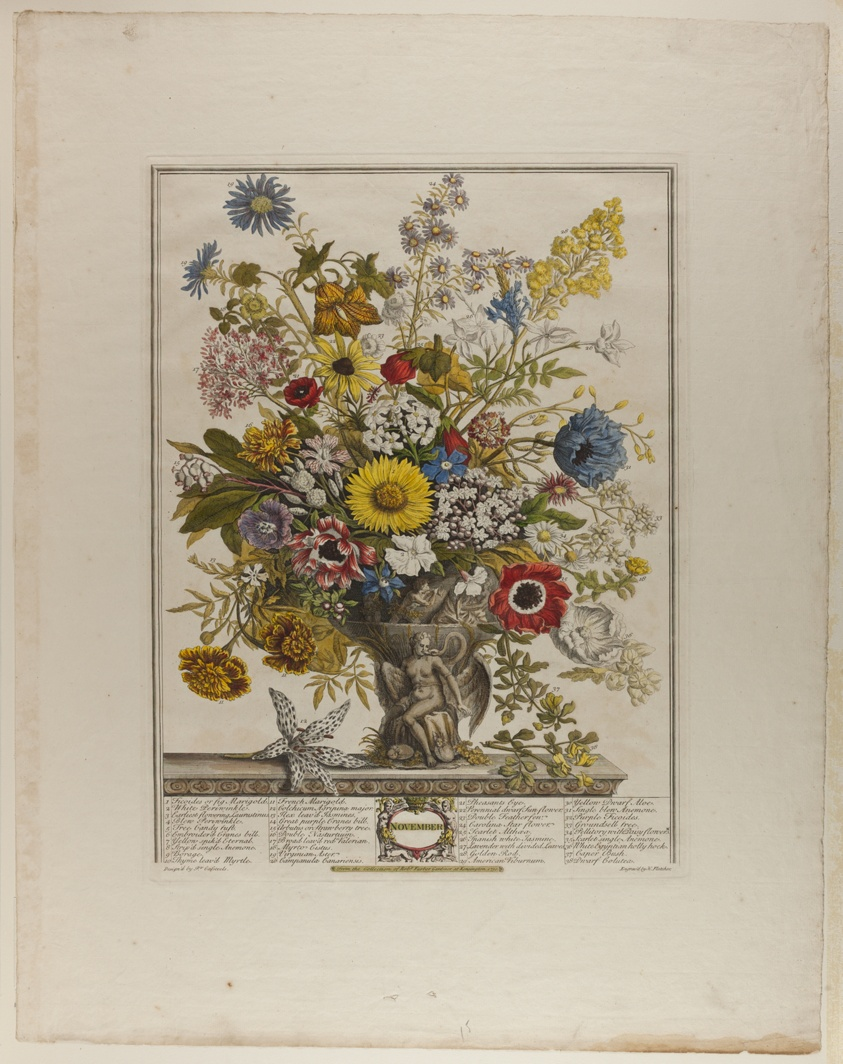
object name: Print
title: November, from Twelve Months of Flowers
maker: Henry Fletcher (English, 1710-1750); after Peter Casteels III (Flemish, 1684-1749)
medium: Engraving in black ink with opaque and translucent watercolor on cream laid paper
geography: England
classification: etching; print; prints and drawing